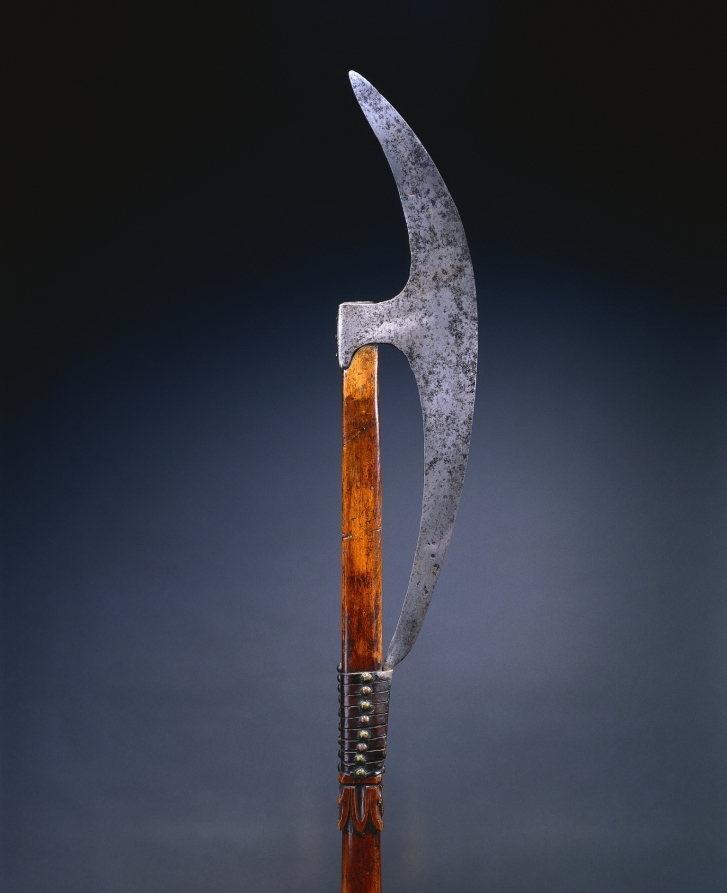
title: Bardiche (Pole Axe)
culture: Germany or Russia, 16th century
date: 1500s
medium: steel, leather, brass; wood haft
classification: Arms and Armor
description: A bardiche is a type of polearm that was used from the 1300s to the 1600s in Europe. Although similar to a halberd it does not have the hook. The shape of the blade can vary but the defining feature is that one end is fastened to the wooden shaft.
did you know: Hung high on the wall of the Armor Court, this weapon of war, standing almost six feet tall, was sure to intimidate any approaching soldier.